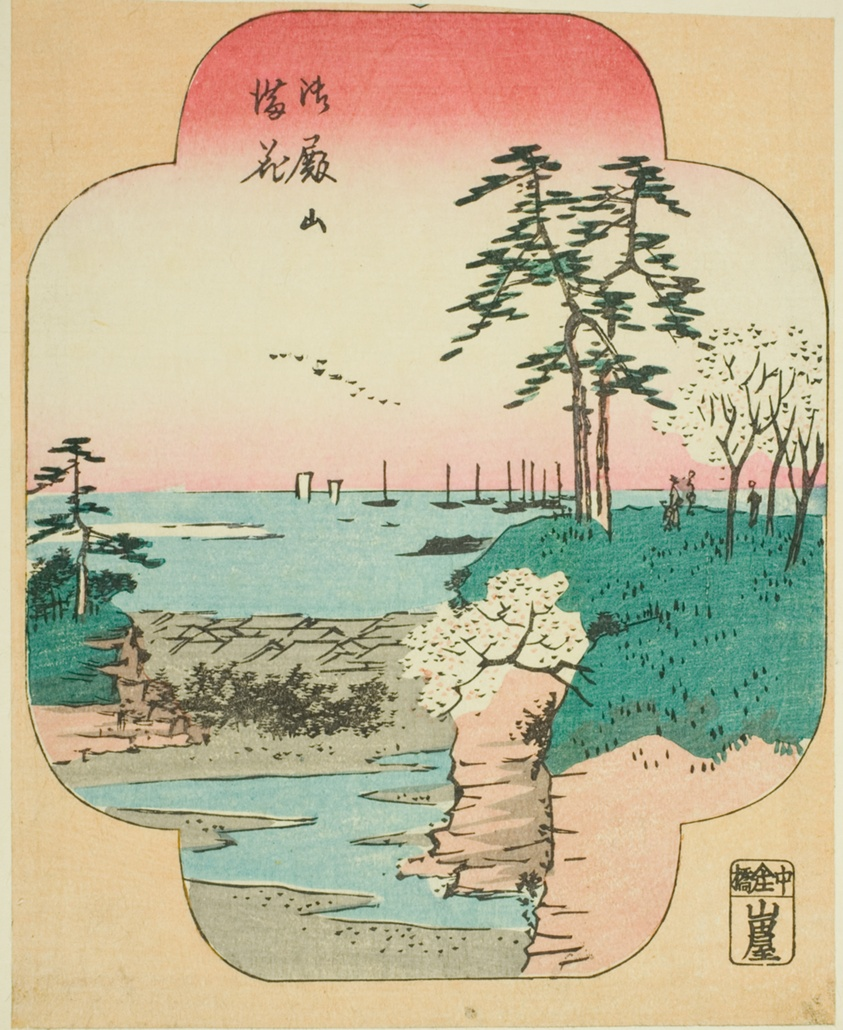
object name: Print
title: Cherry Blossoms in Full Bloom at Goten Hill (Gotenyama manka), section of a sheet from the series "Cutout Pictures of Famous Places in Edo (Edo meisho harimaze zue)"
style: Japanese (culture or style)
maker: Utagawa Hiroshige 歌川 広重; Japanese, 1797-1858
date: 1857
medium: Color woodblock print; section of harimaze sheet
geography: Japan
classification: woodblock print; print; asian art